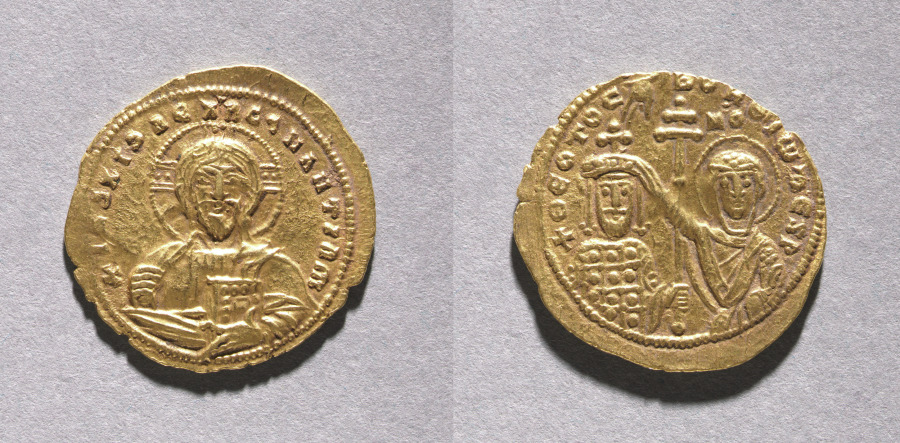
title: Nomisma with John I Zimisces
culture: Byzantium, Constantinople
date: 969–976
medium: gold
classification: Coins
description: The vast number of surviving Byzantine coins attests to the level of trade across the empire. Controlled and supervised by the emperor, the producers of coins took care to represent his authority and reflect his stature. Talented artists were recruited to engrave the dies (molds) used for the striking of coins. Emperors increasingly came to include their heirs and co-emperors on their coinage, as well as other family members or even earlier rulers. Coins were recognized, then as now, as small, portable works of art. With their inscriptions and images, Byzantine coins provide valuable documentation of historical events and a record of the physical appearance of the emperors. The coins shown here include the solidus, the basic gold coin of 24 karats; the tremissis, a gold coin of one-third the weight and value of the solidus; and the nomisma, which in the 10th century replaced the solidus as the standard gold coin.